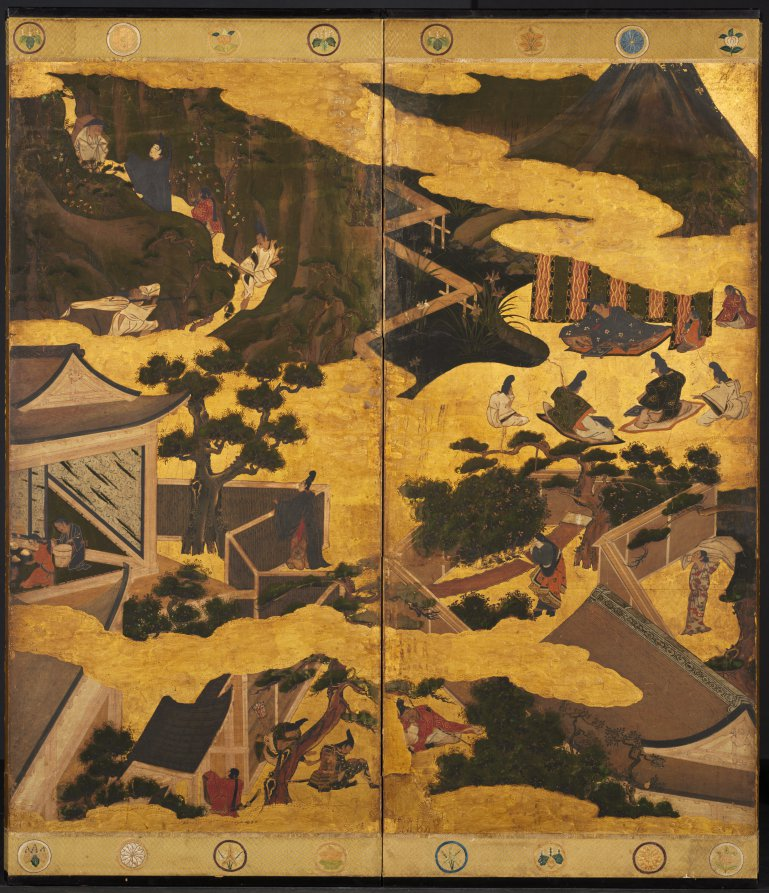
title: Scenes from the Tales of Ise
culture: Japan, Edo period (1615–1868)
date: mid-1600s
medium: One of a pair of six-panel folding screens; ink, color and gold on paper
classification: Painting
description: While the 11th-century Tale of Genji is universally regarded as Japan's literary masterpiece, the source for visual imagery in Japanese culture is rivaled by another literary classic, the Tales of Ise. A 10th-century anthology of poems interspersed with commentary, the Ise portrays the emotional and geographical journey of a courtier from the capital (Kyoto) into the countryside and beyond. The poems describe features of the natural, untamed terrain, linking them to the rather melancholy state of the traveler. Since the Tales of Ise was—and remains today—well read by educated Japanese, a person viewing these folding screens would immediately recognize its subject, organized as a series of discrete scenes read from right to left. Neither a signature nor a seal identifies the artist, but judging from related paintings, the work can be ascribed to an artist working in Kyoto during the first quarter of the 17th century in the manner of the painter Iwasa Matabei (1578–1650). This type of historical narrative composition became quite popular around 1600 among patrons favoring a distinctly Japanese style of painting which employed rich mineral pigments and a liberal use of gold.